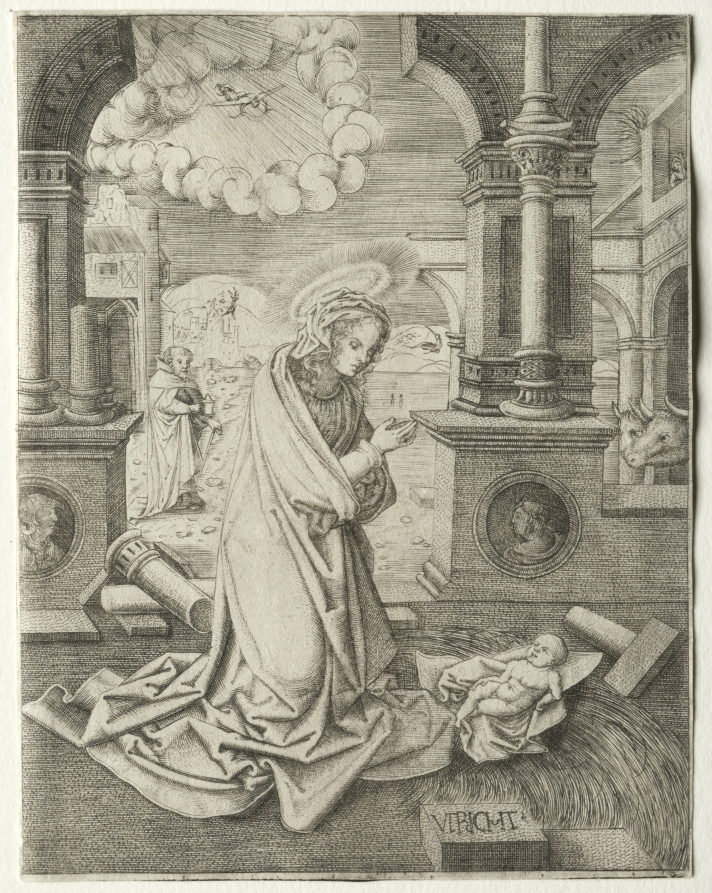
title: The Nativity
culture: Netherlands, 16th century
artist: Allaert Claesz. (Netherlandish, active c. 1520–26)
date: 1520s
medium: engraving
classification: Print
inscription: lower right, in plate: VTRICHT ; VERSO, upper left and upper right, in graphite: [two identical illegible inscriptions] ; lower left, in graphite: VIII 263 ; lower left, in graphite: [h F gl / N ]27535